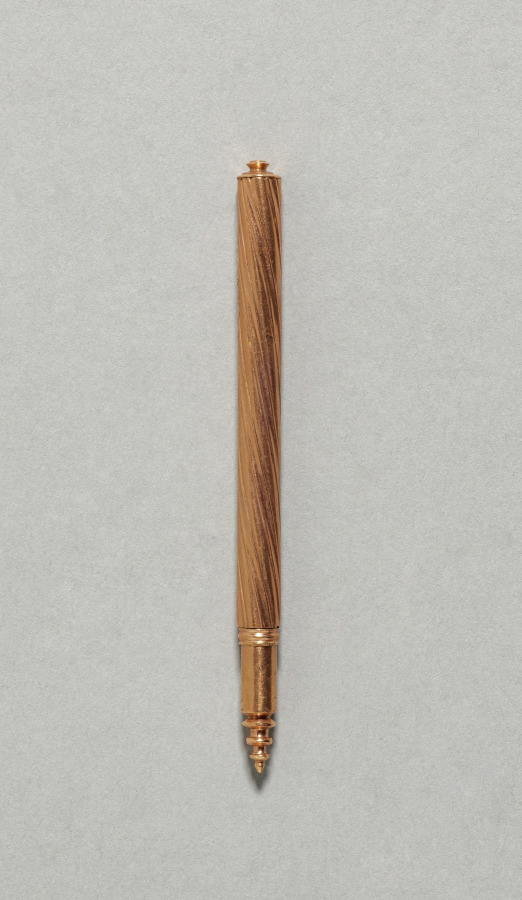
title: Pencil from a Sewing Box (Nécessaire)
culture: Austria, possibly Vienna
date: c. 1765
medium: gold and mother-of-pearl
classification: Miscellaneous